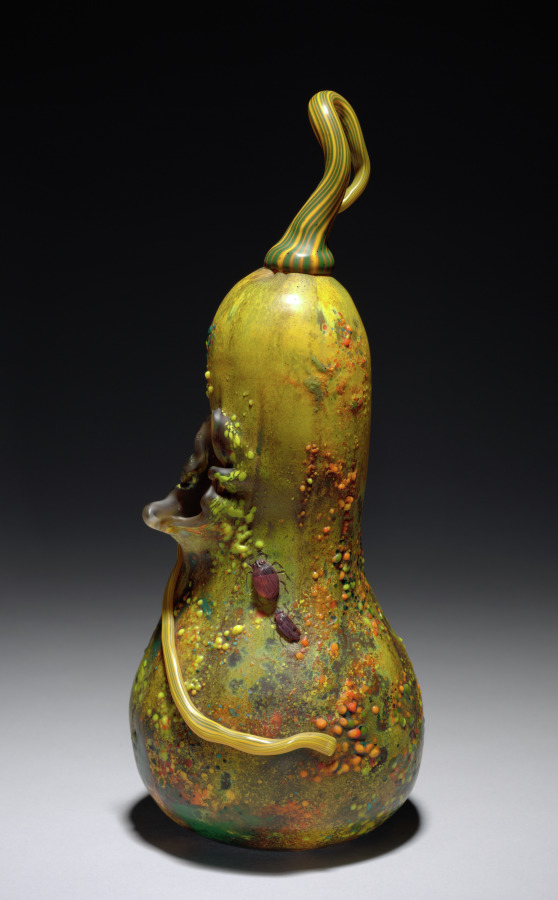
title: Vase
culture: France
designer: Daum Frères (French, founded 1875)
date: c. 1910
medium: Blown, cast, and vitrified glass with applied, wheel-engraved decoration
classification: Glass